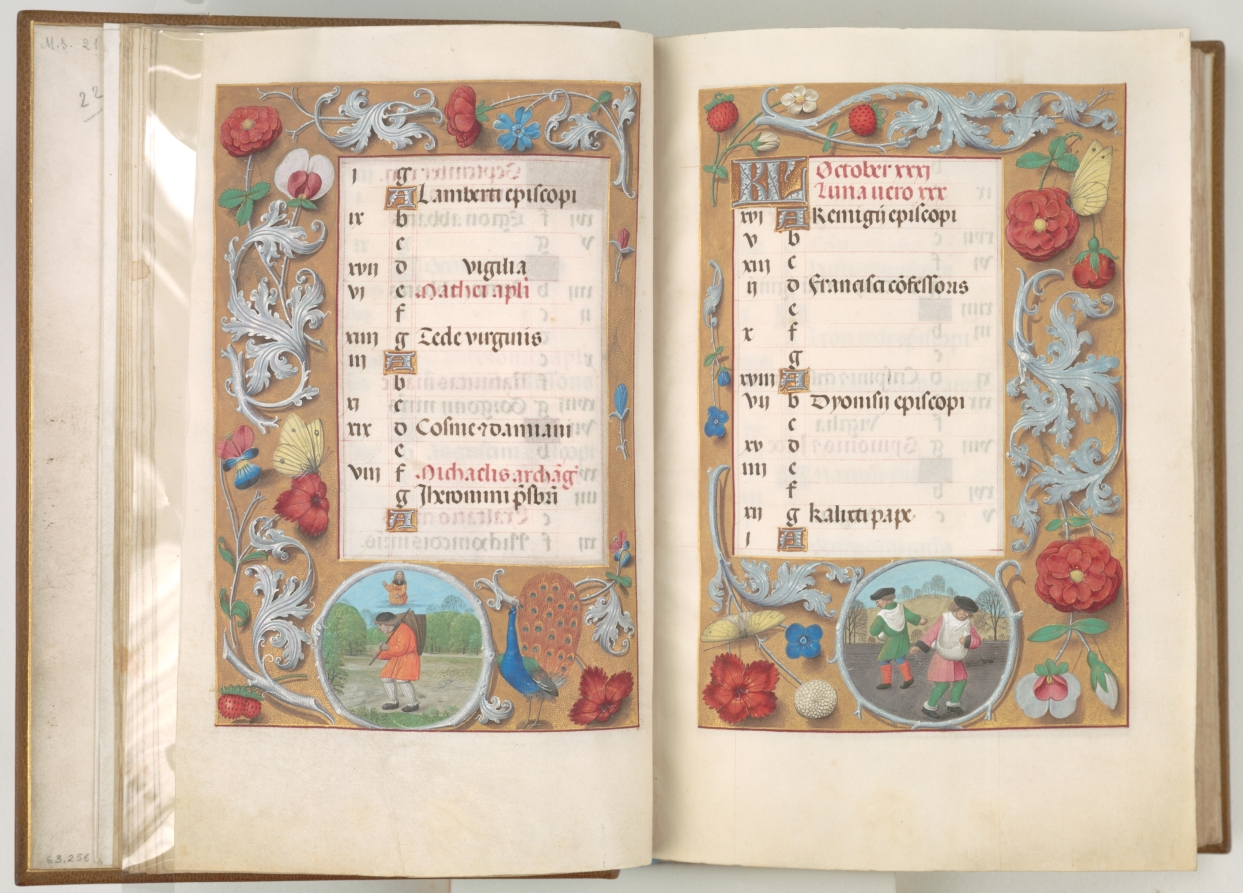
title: Hours of Queen Isabella the Catholic, Queen of Spain: Fol. 11r, October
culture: Flanders, Ghent and Bruges, late 15th century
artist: Master of the First Prayerbook of Maximillian (Flemish, c. 1444–1519)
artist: and Associates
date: c. 1500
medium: ink, tempera, and gold on vellum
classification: Bound Volume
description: This manuscript was illuminated by a circle of at least five highly organized manuscript painters active in the Flemish cities of Ghent and Bruges. The principal illuminator was Alexander Bening, who painted the majority of the book's miniatures. Manuscripts produced by this circle of artists are renowned for the decoration of their borders, which typically feature a rich variety of realistically-painted flowers, birds, and butterflies. This prayer book, called a book of hours, was intended not for a cleric, but for the private devotions of a lay person-in this case, Isabella the Catholic, Queen of Spain (1451-1504). Isabella's coat of arms embellishes the book's frontispiece. It is unlikely that the book was commissioned by the Queen herself; rather, she probably received it as a diplomatic gift from someone courting her patronage, perhaps Cardinal Francisco Jimenez de Cisneros. A Franciscan friar, Jimenez was dependent upon Isabella for his advancement, first to the post of Queen's confessor in 1492, and then to Archbishop of Toledo in 1495.